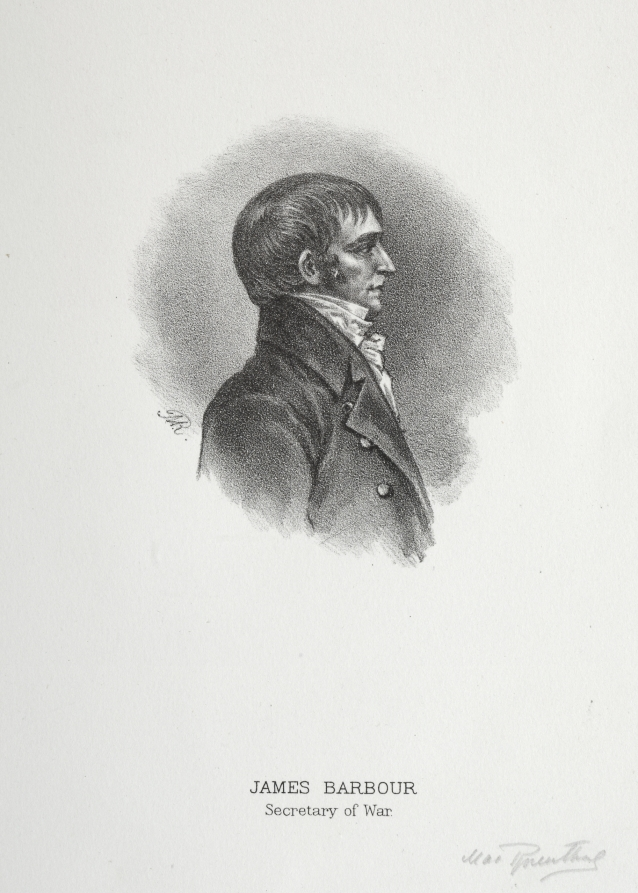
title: James Barbour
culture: America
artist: Max Rosenthal (American, 1833–1918)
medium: lithograph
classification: Print